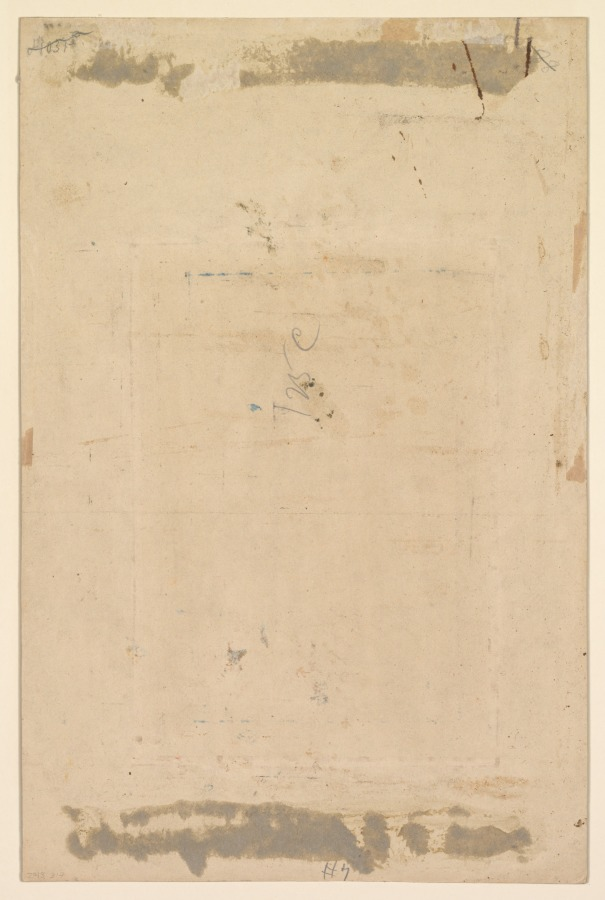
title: Akbar and Jahangir Examine a Ghir Falcon while Prince Khusrau Stands Behind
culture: Mughal India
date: c. 1602–4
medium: gum tempera and gold on paper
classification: Painting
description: Emperor Akbar sits against a purple bolster under a canopy looking aged and careworn, probably not long before his death. He examines a trained falcon of the type that the Mughals used in hunting. This falcon appears to be from Akbar’s son, Prince Salim, who stands before him in a gesture of gift-giving. A stately black antelope, a wild animal now a pet, harnessed and wearing a bell, crouches at the foot of the steps leading up to the canopied platform.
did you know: Salim rests his hand on a sharply pointed dagger in a red velvet sheath.